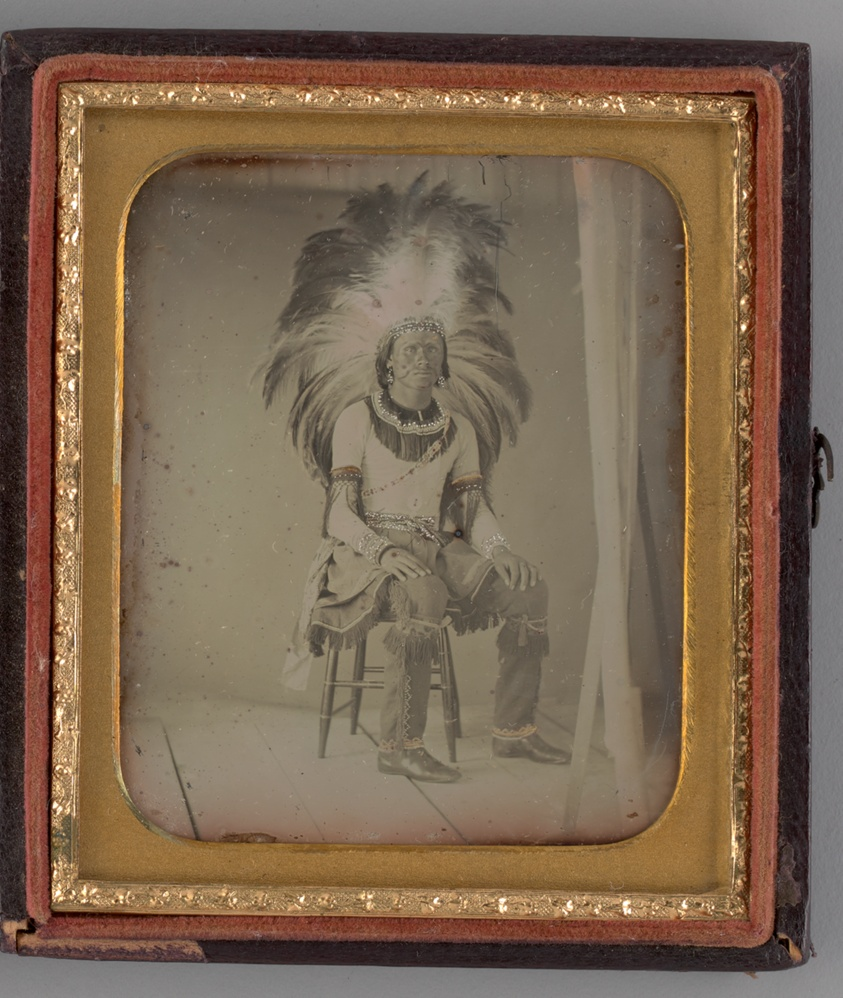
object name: Photograph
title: Untitled (Portrait of Seated Man with Headdress)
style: 19th century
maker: Unknown maker; American, 19th century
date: 1850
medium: Daguerreotype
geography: United States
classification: portrait; photograph; photographic process; photography; portrait; daguerreotype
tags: lundberg collection, men, native american, headdresses, portrait, Male, portraits, portraits: male subject